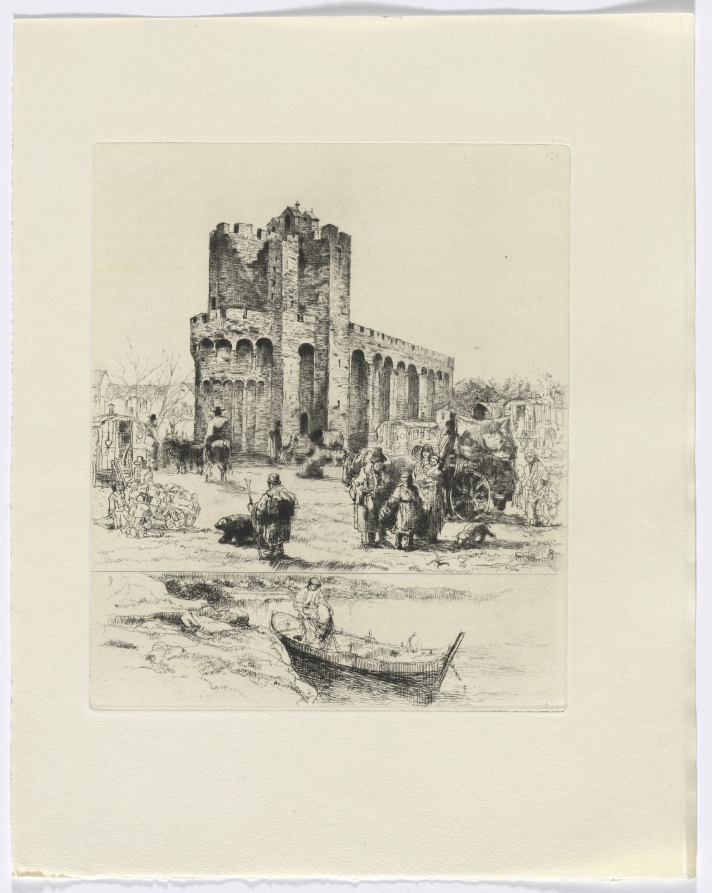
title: Frédéric Mistral: Mémoires et Recits by Frédéric Mistral: Romanesque church and figures/ man in boat (insert after p. 168)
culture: France, 20th century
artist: Auguste Brouet (French, 1872–1941)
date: 1937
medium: etchings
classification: Portfolio